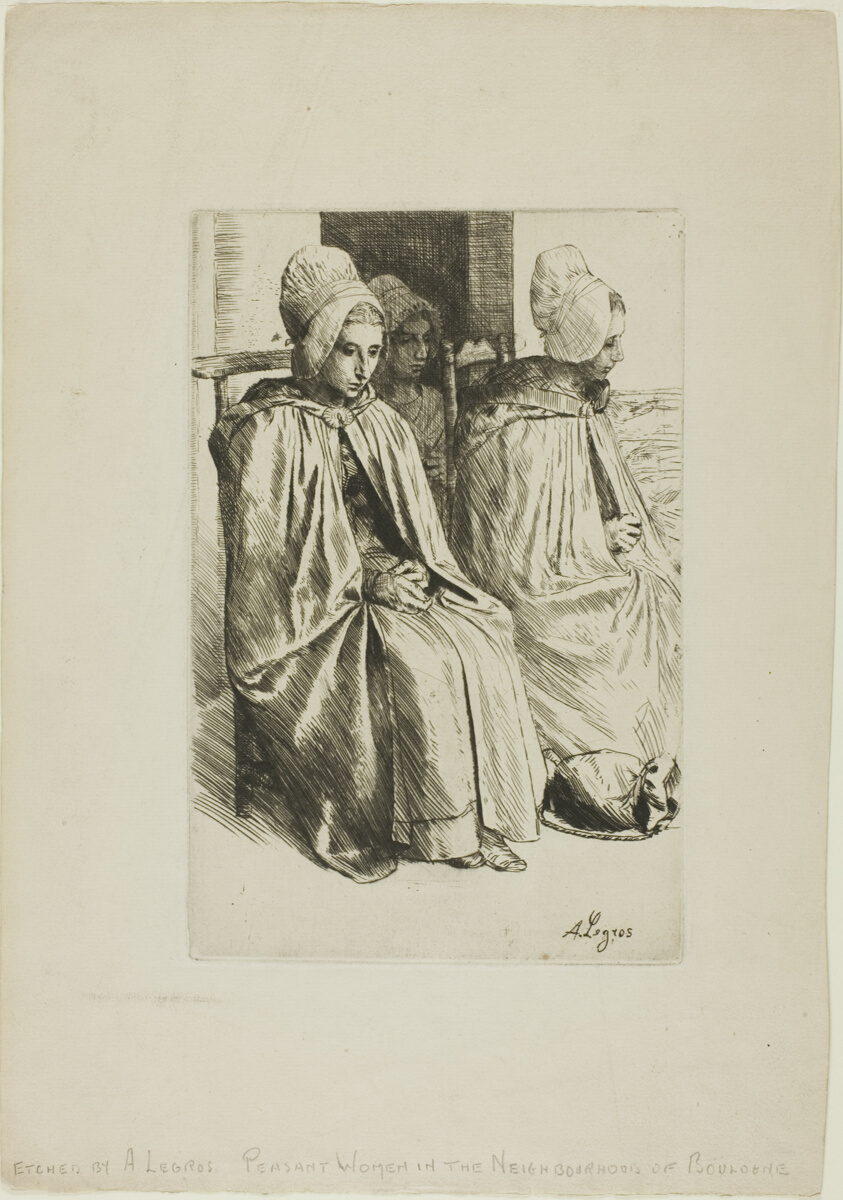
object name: Print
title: Peasant Women from Near Boulogne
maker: Alphonse Legros (French, 1837-1911)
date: 1873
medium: Etching on cream laid paper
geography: France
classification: etching; print; prints and drawing